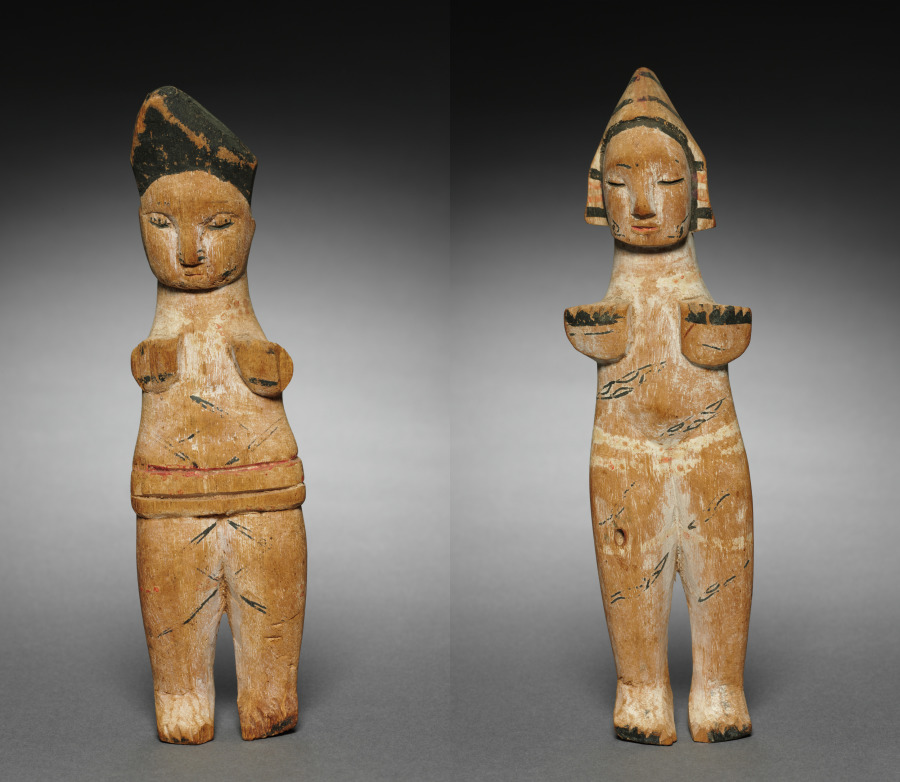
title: Pair of Dolls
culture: Africa, West Africa, Nigeria, Ibibio style, unknown artist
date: 1900s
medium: Wood, kaolin, and paint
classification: Sculpture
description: Young Ibibio girls would play with dolls for fun. They also took on deeper significance when a girl entered seclusion to go through preparations for adulthood and marriage, representing her future children and promoting her fertility. The kaolin (white clay) that once covered the figures' bodies has been worn off, possibly through handling during play. Thin lines represent uli, a kind of body painting. Upraised, foreshortened hands with open fingers were typical of dolls carved by Ibibio people from the Anang group.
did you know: Dolls like this were sold at markets where they were purchased as symbolic playthings for girls or souvenirs for tourists.